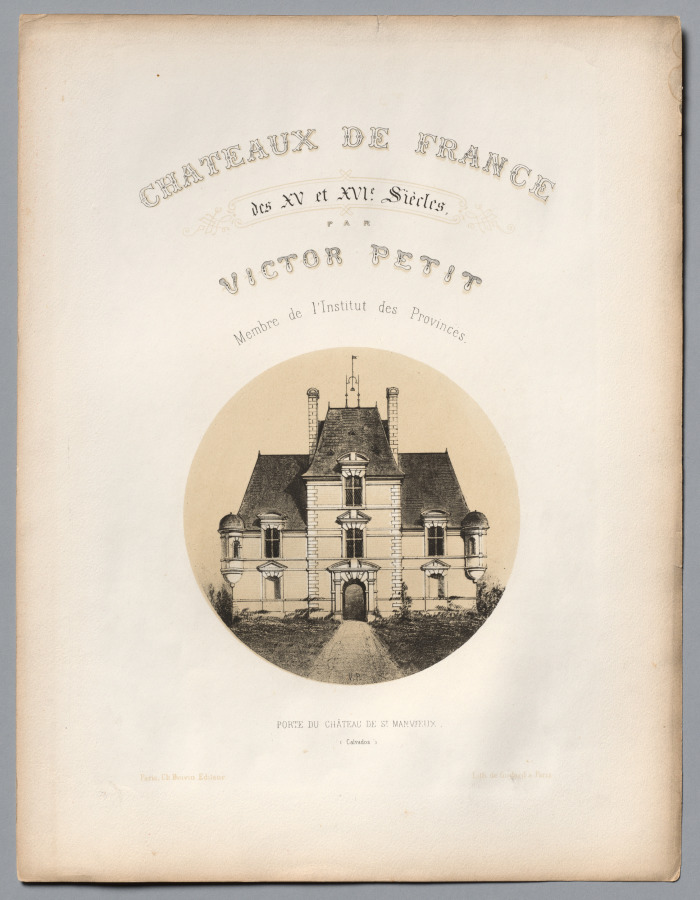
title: Architecture Pittoresque ou Monuments des xveme. Et xvieme. Siecles: Chateaux De France des XV et XVI Siecles: Frontispiece, Porte du Château de St Manvieux (Calvados)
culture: France, 19th century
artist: Victor Petit (French, 1817–1874)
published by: Ch. Boivin; Printer: Godard, Paris; Printmaker: Victor Petit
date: 1860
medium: lithograph, from portfolio of 100 lithographs with tint stone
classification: Portfolio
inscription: In plate, lower center: V.P; in plate: CHATEAUX DE FRANCE / des XV et XVIe Siècles, / par / VICTOR PETIT / Membre de l'Institut des Provinces. /PORTE DU CHÂTEAU DE ST MANVIEUX / (Clalvados) / Paris Ch. Boivin Editeur Lith de Godard a Paris